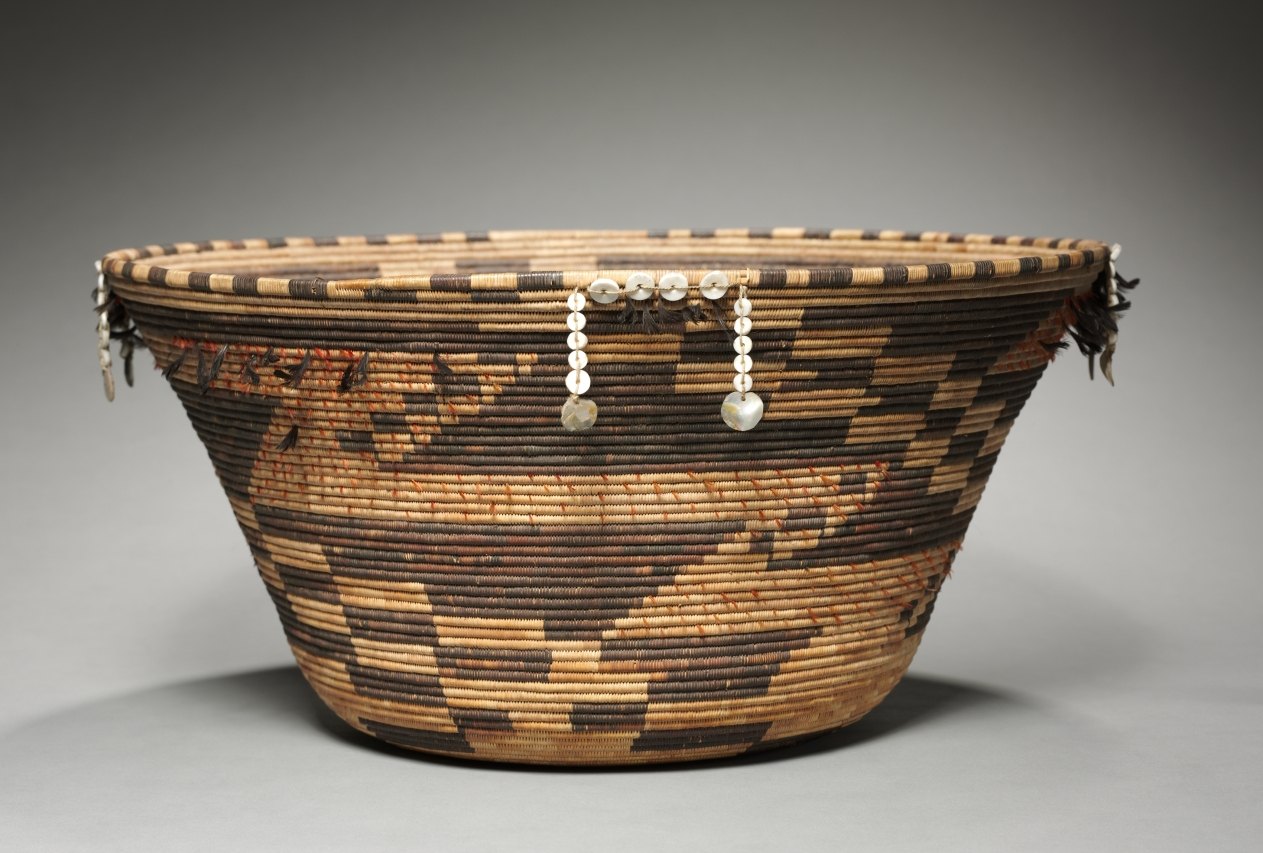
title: Puberty Basket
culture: California, Pomo, late 19th century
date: 1890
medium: coiled, quail and woodpecker feathers, shell, abalone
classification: Basketry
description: This finely woven basin is based on a traditional form that young Pomo women used to wash themselves after ceremonial seclusion following their first menses. The example on display, however, was made for the outside market.